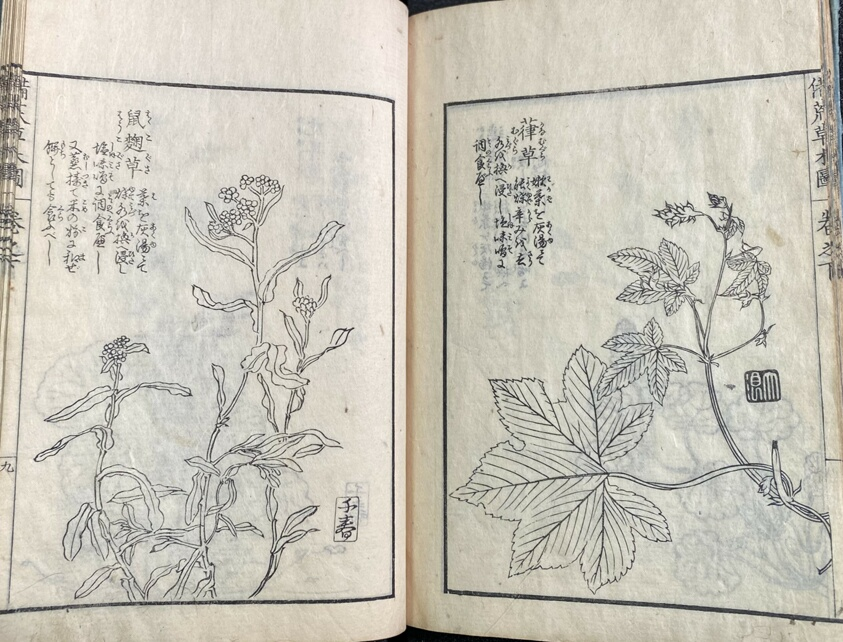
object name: Book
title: Biko Somokuzu (Record of Plants to Stave Off Famine ), 3 vols.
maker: Ure Tenshodo, publisher; Japanese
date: 1833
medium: Woodblock-printed books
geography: Japan